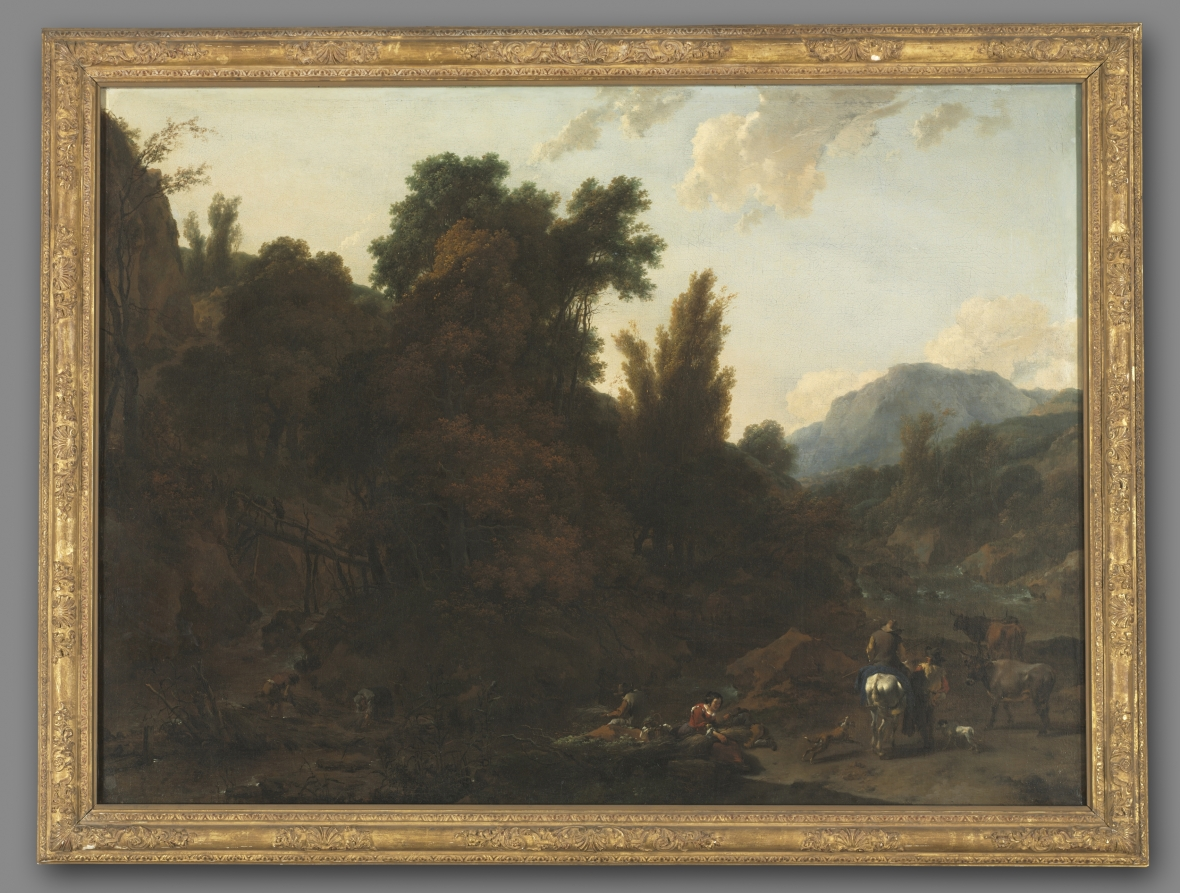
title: Rush Gatherers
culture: Netherlands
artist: Nicolaes Berchem (Dutch, 1620–1683)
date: 1657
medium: oil on canvas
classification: Painting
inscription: Signed lower left: "CBerchem / 1657 [CB in monogram]"